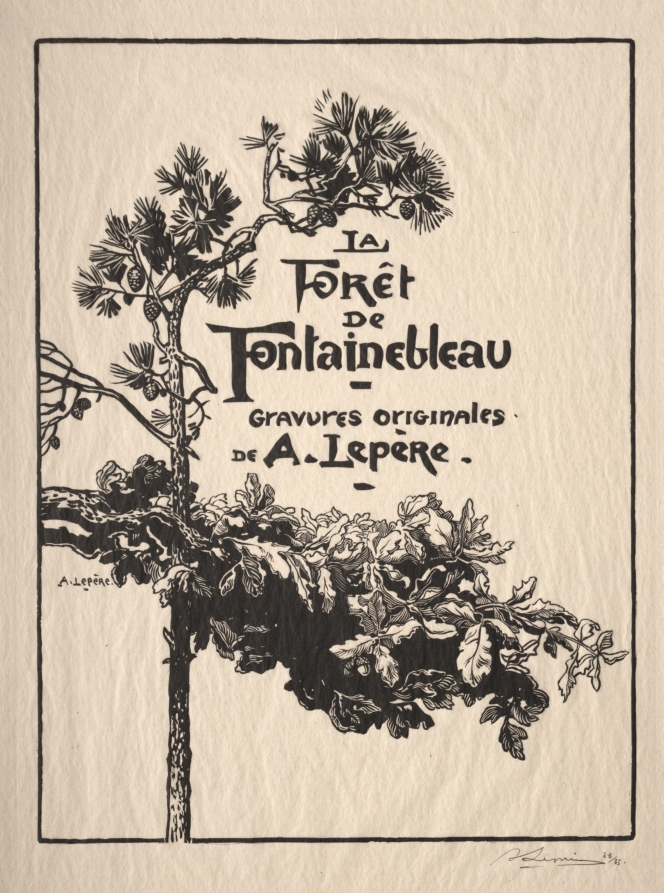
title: Fontainebleau: Frontispiece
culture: France, 19th-20th century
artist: Auguste Louis Lepère (French, 1849–1918)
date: c. 1887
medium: wood engraving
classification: Print